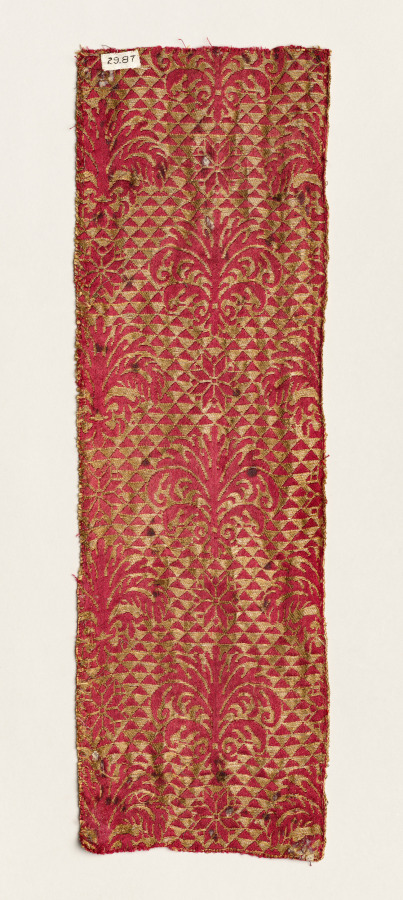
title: Fragment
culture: Africa, North Africa, Egypt, Mamluk Sultanate (1250–1517), Egyptian weaver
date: probably 1500s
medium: Silk, gold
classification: Textile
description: This fragment is made of silk, with gold thread. It is woven in a complex technique called lampas weave.